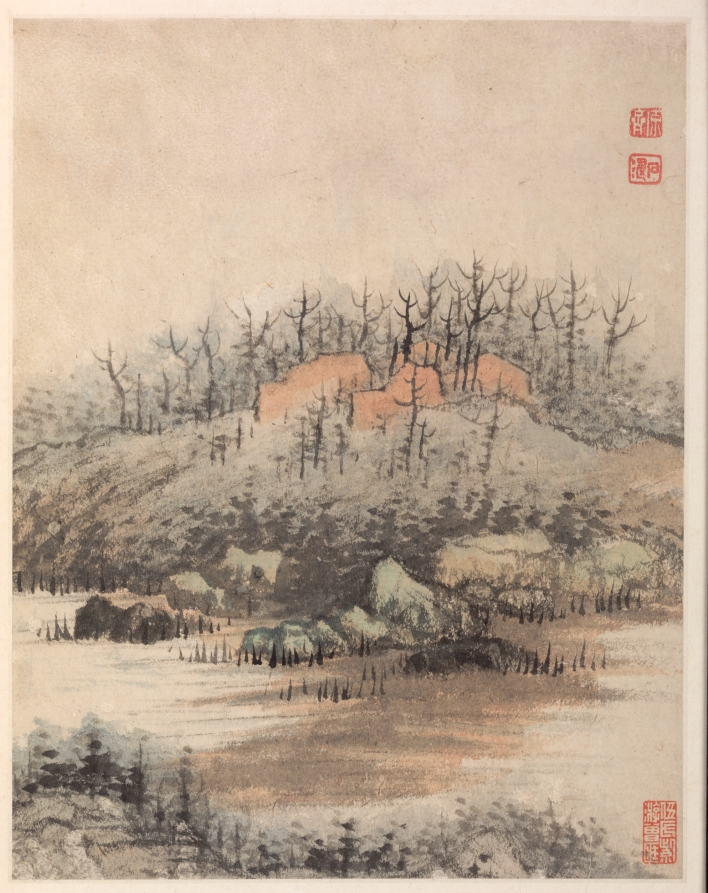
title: Reminiscences of Qinhuai River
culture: China, Qing dynasty (1644-1911)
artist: Shitao (Chinese, 1642–1707)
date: 1642–1707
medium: album leaf, ink and color on Song paper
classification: Painting